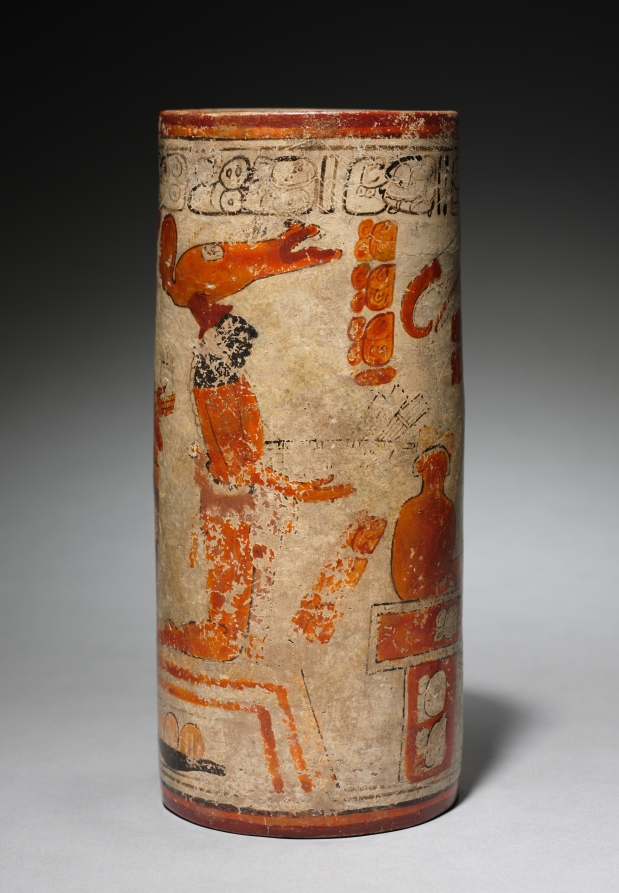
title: Painted Vase with Ruler and Scribe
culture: Guatemala, Northern Peten or Mexico, Southern Campeche, Maya, late Classic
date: 600–900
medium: pottery with burnished, colored slips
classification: Ceramic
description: Among Maya noble families, finely painted ceramic vessels were used as fancy tableware, treasured gifts that secured the support of allies, and funerary offerings placed in tombs. Accordingly, the vessels’ imagery varies from religious themes to scenes of courtly life. Here, two attendants kneel before an enthroned nobleman who wears an enormous bird-head headdress.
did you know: A string of death glyphs below the rim departs from the Primary Standard Sequence.